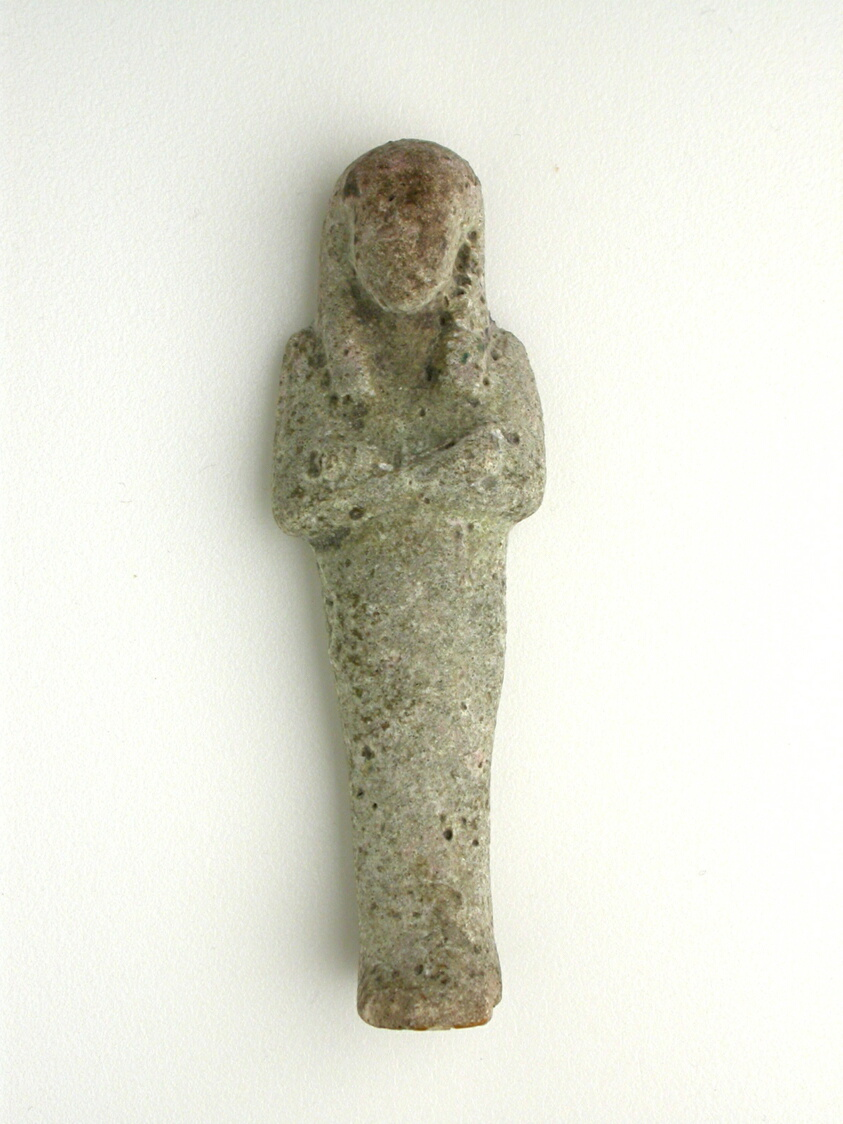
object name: Funerary Object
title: Shabti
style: egyptian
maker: Egyptian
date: Third Intermediate Period, Dynasties 21–22 (about 1069–715 BCE)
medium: Faience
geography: Egypt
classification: ushabti; ceramics; funerary; figurine; ancient art; faïence (composite material)